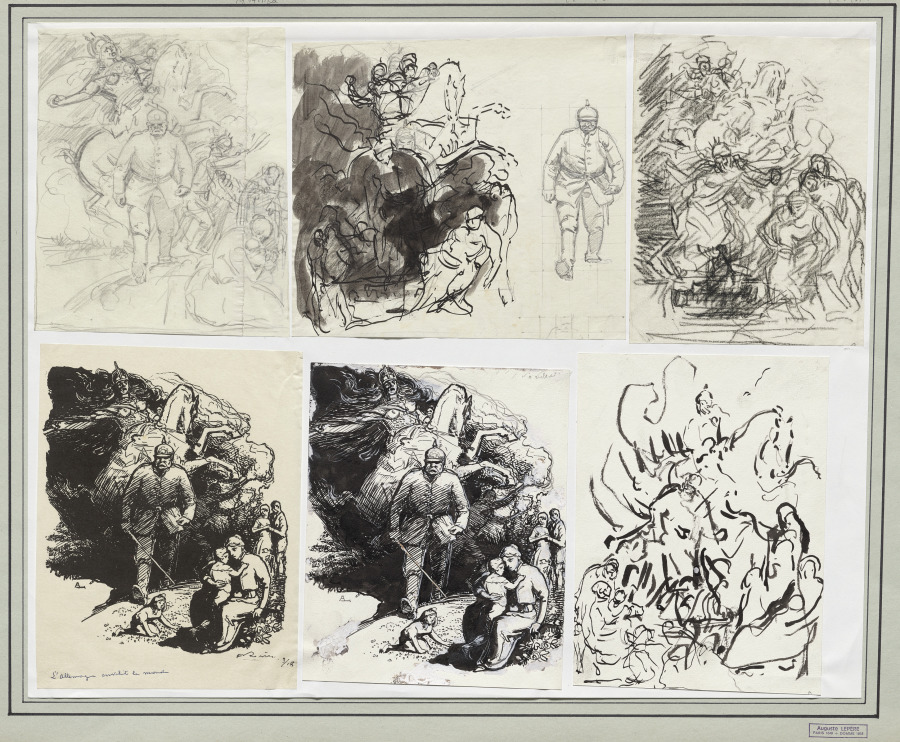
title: L'Allemagne envahit le monde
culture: France, 20th century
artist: Auguste Louis Lepère (French, 1849–1918)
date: 1914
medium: black crayon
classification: Drawing